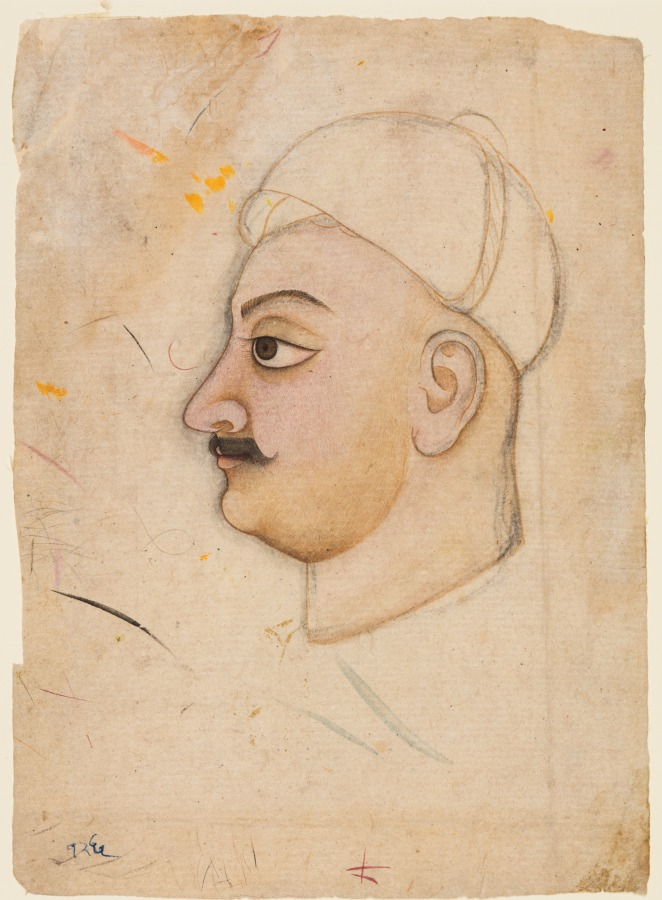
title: Drawing of a Man’s Head with an Unusual Turban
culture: Northwestern India, Rajasthan, Rajput Kingdom of Kishangarh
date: c. 1780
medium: gum tempera and gold on paper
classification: Painting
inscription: Nagari number ‘126’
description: The painting is a study of a man’s head, perhaps for a finished portrait. It was a common practice among artists to make preparatory sketches of people, to be manifested in later portraits. The artist has rendered the drawing with heavy outline on the eyebrows, eye, and moustache, while soft tones are employed for the modelling of the face.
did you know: The man in the study appears to be a Hindu Rajput noble.